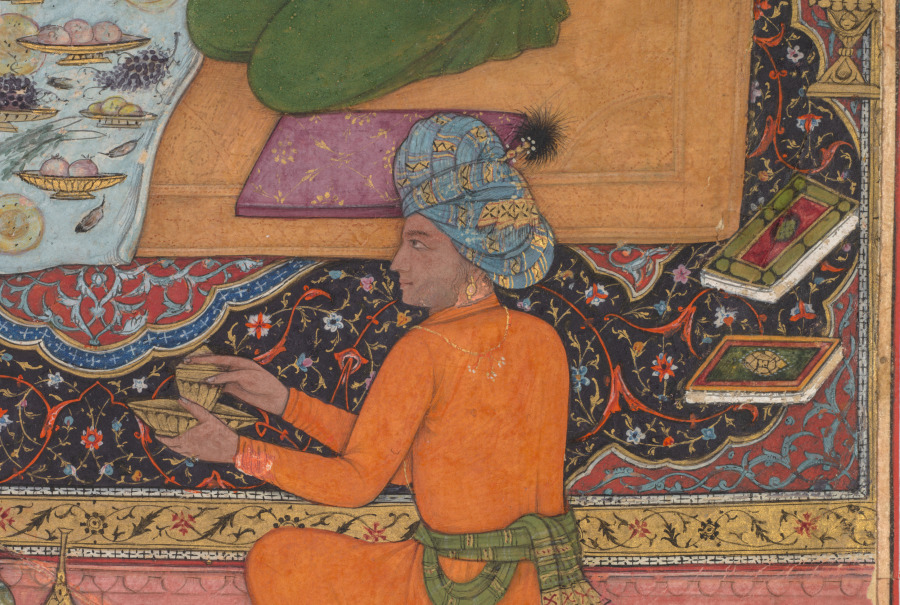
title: A Royal Picnic on a Terrace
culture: Mughal India, court of Akbar (reigned 1556–1605)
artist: attributed to Muhammad Ali (Persian, active 1590–1620)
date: c. 1620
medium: Gum tempera and gold on paper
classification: Painting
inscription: later Hindi inscription on reverse: Babur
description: A richly patterned carpet spans the width of the composition and forms the setting for a royal visit. The status of the highest-ranking person is indicated by the tan cloth placed over the carpet and the voluminous wine-colored cushion ornamented with stylized gold clouds. An attendant holding an emblem of Indian royalty, the fly whisk, stands to one side. At the far right of the carpet are two books, indicating that they are learned men. Like the carpet, the book covers have central medallions and borders, in line with the Persian aesthetic that the Mughals of India held in high regard.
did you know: A gentleman connoisseur has tucked a flowering sprig into his voluminous turban.